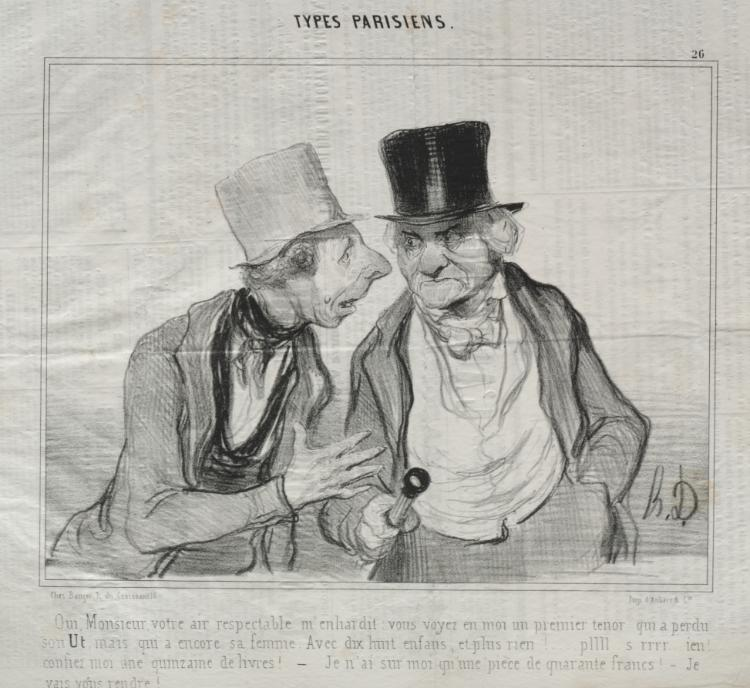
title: Yes, Sir, your respectable air encourages me...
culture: France, 19th century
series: Parisian Types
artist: Honoré Daumier (French, 1808–1879)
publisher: Aubert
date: 1841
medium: lithograph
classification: Print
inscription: Lower margin, printed: Chez Bauger R de Croissant 16 / Imp. d'Aubert & Cie. ; in pencil: 3835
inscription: Above image, printed: TYPES PARISIENS. / 26; Below image, printed: Oui, Monsieur, votre air respectable m'enhardit: vous voyes en nmoi un premier tenor qui perdu / son Ut, mais qui a encore sa femme. Avec dix huit enfans, et plus rien!.... pllll.. s rrrr... ein!.. / confiez moi une quinzaine de livres! - Je n'ai sur moi qu'une pièce de quarante francs! - Je / vais vous rendre!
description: This print was published in Le Charivari (August 08, 1841) as plate 26 from the series Parisian Types.